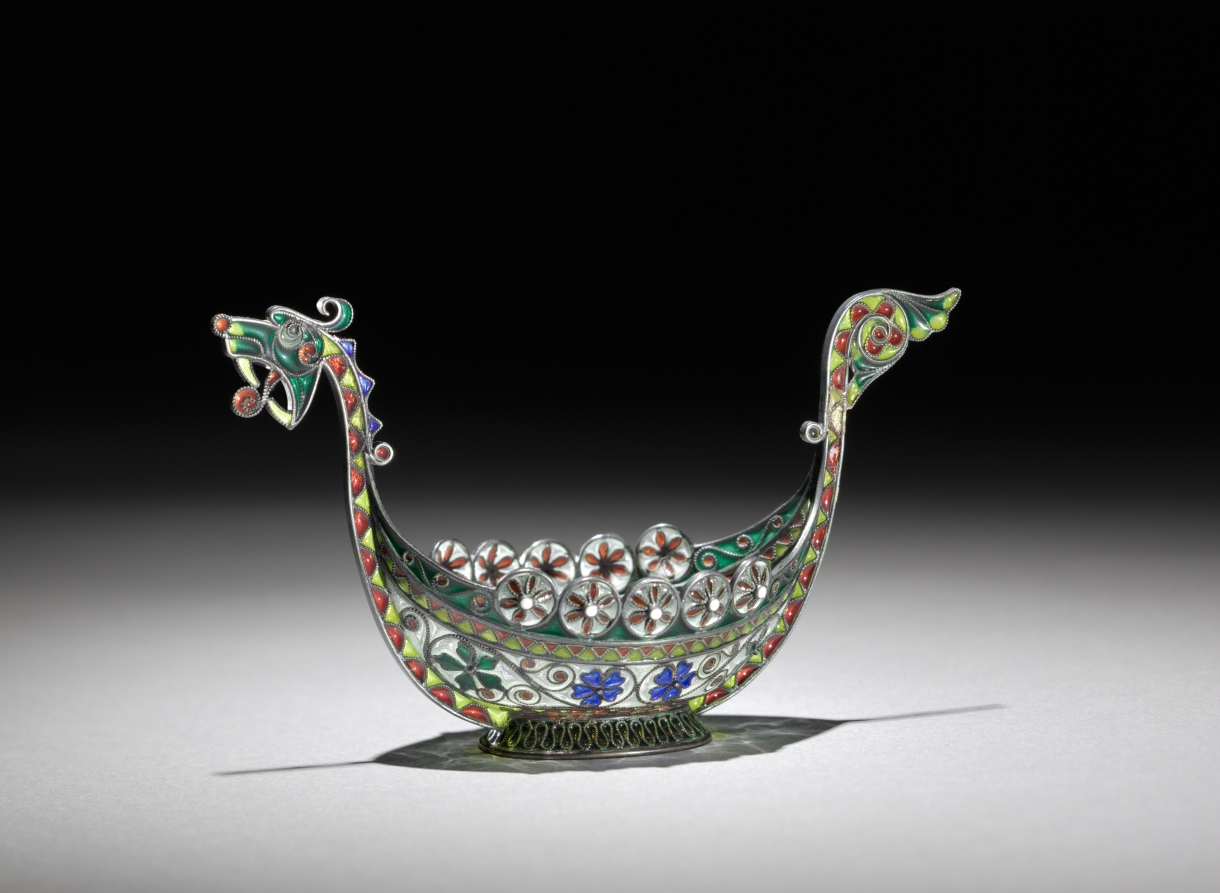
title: Salt Cellar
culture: Norway, Bergen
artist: Marius Hammer (Norwegian, 1847–1927)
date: c.1890–1900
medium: gilt silver, enamel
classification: Enamel